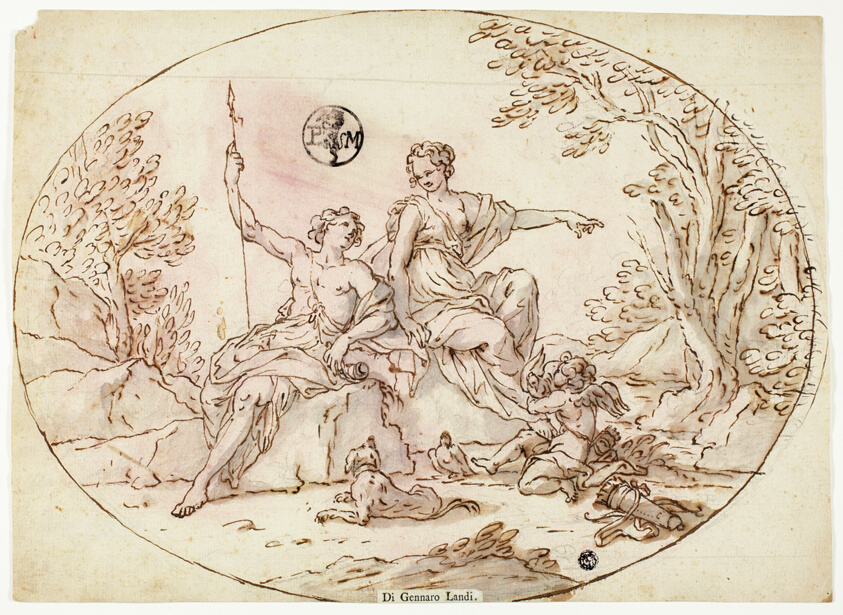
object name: Drawing and Watercolor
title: Venus and Adonis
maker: Attributed to Gennaro Landi; Italian, active 17th century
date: 17th century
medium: Pen and brown ink, with brush and gray and pink wash, over graphite, on cream laid paper, pricked for transfer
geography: Italy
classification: pen and ink drawings; drawings (visual works); prints and drawing